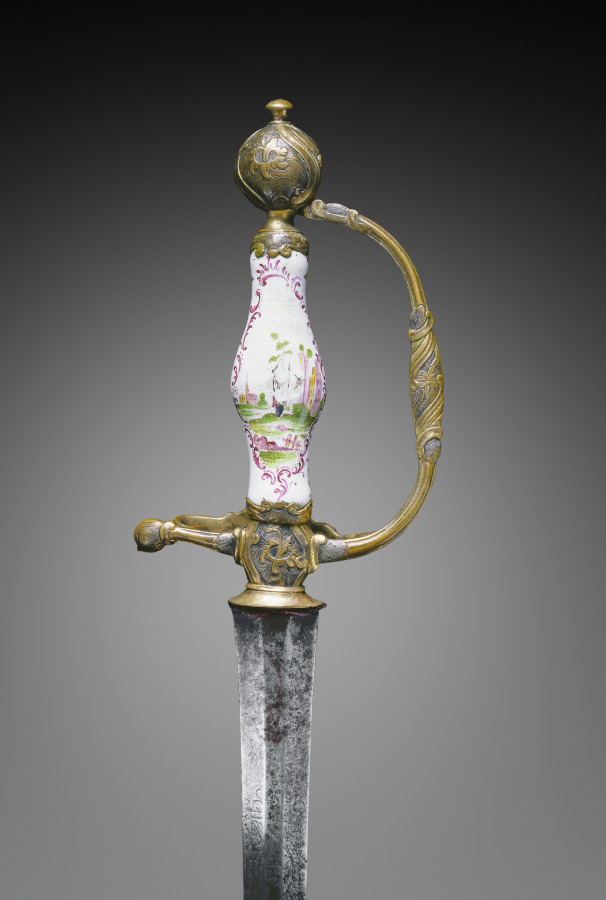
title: Small Sword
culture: Germany, 18th century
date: c. 1770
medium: steel, gilt-brass, porcelain grip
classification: Arms and Armor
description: The small-sword was a light, quick weapon that emerged during the 18th century. It was carried by unarmored civilians, the noblemen of the upper classes. The porcelain hilt, elaborately decorated, would have been visible even when the sword was sheathed–making this object more an accessory of male attire than a utilitarian weapon.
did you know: Small-swords with porcelain grips became fashionable in the mid- to late 1700s and added a colorful splash to male attire.